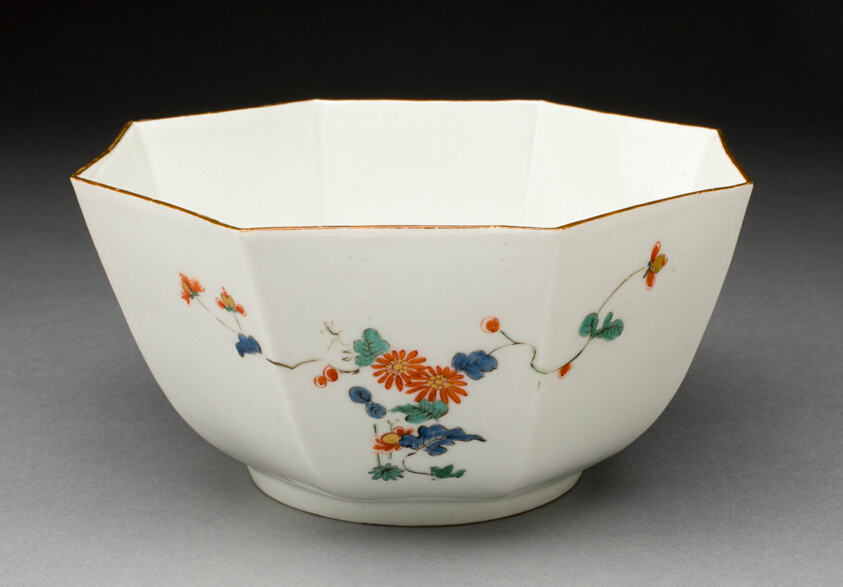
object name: Ceramics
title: Bowl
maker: Meissen Porcelain Manufactory (German, founded 1710)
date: c. 1732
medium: Hard-paste porcelain, polychrome enamels, and gilding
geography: Meissen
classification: bowl; tableware; dish (vessel); porcelain; european decorative arts; ceramics